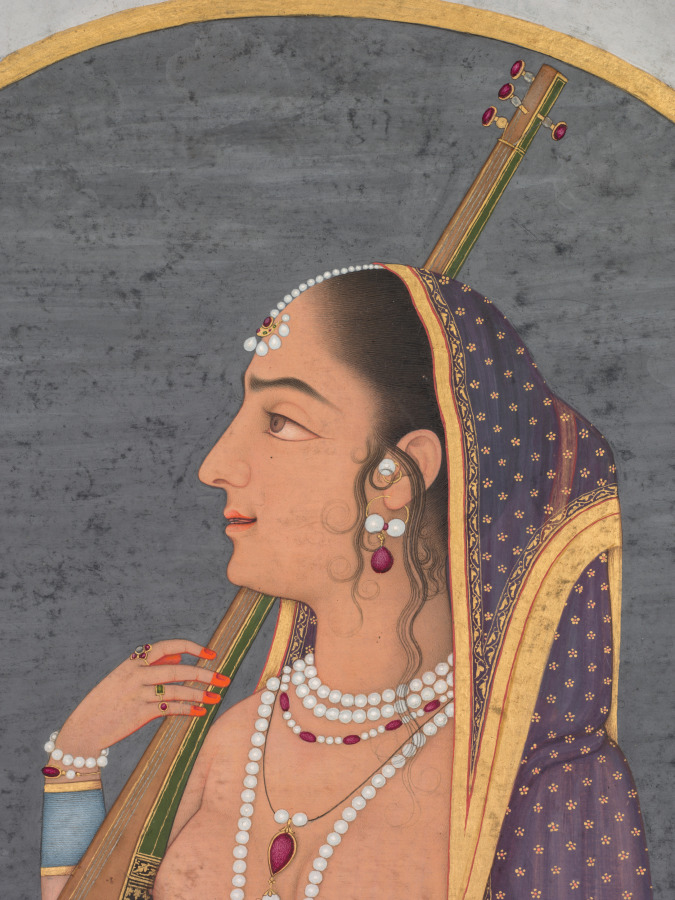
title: Court lady singing and playing the vina (recto)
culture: India, Lucknow, Mughal, 18th century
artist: attributed to Muhammad Rizavi Hindi (Indian, active mid-1700s)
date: c. 1760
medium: Gum tempera, ink, and gold on paper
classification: Painting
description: Her mouth open slightly in song, the woman’s hennaed fingers strum a three-string vina, an Indian musical instrument with a resonator made from a gourd. Music was an essential component of courtly entertainment, along with the drinking of wine and the appreciation of poetry, paintings, and jewels.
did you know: When the mouth is open, and teeth and tongue are showing, she is singing.